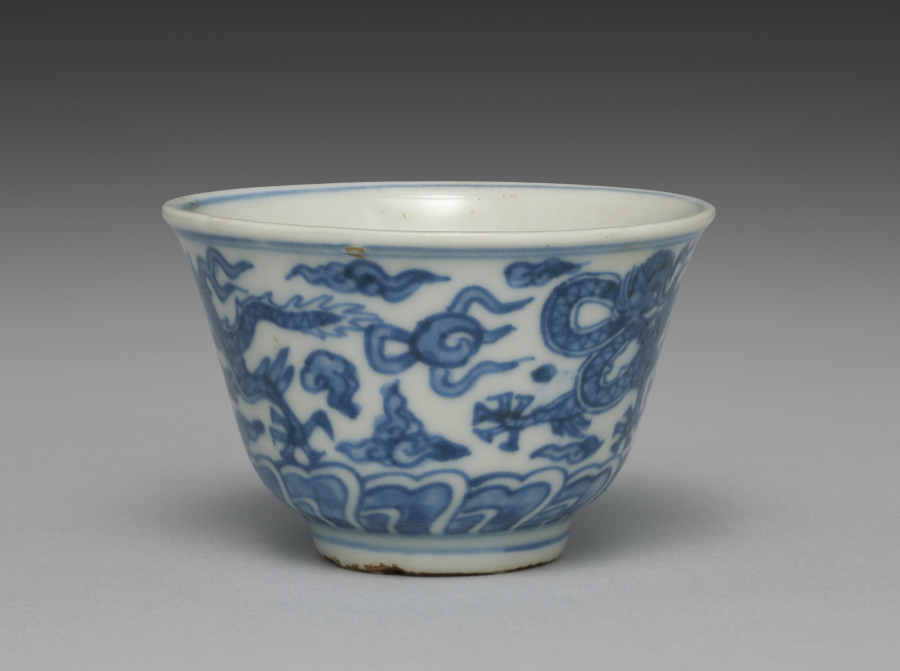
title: Cup from Tea Cups with Dragons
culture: Japan, Edo period (1615–1868)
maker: Seifū Yohei I (Japanese, 1801–1861)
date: 1840s–57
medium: One from a set of five tea cups; porcelain with underglaze blue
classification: Ceramic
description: Seifū Yohei I made both blue and white porcelains after Ming dynasty (1368–1644) Chinese wares fired in the kilns at Jingdezhen for export. He also made colorful stoneware in the style of his teacher, Nin’ami Dōhachi (Takahashi Dōhachi II) (1783–1855).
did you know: A small figure of an elephant serves as the handle for the lid.